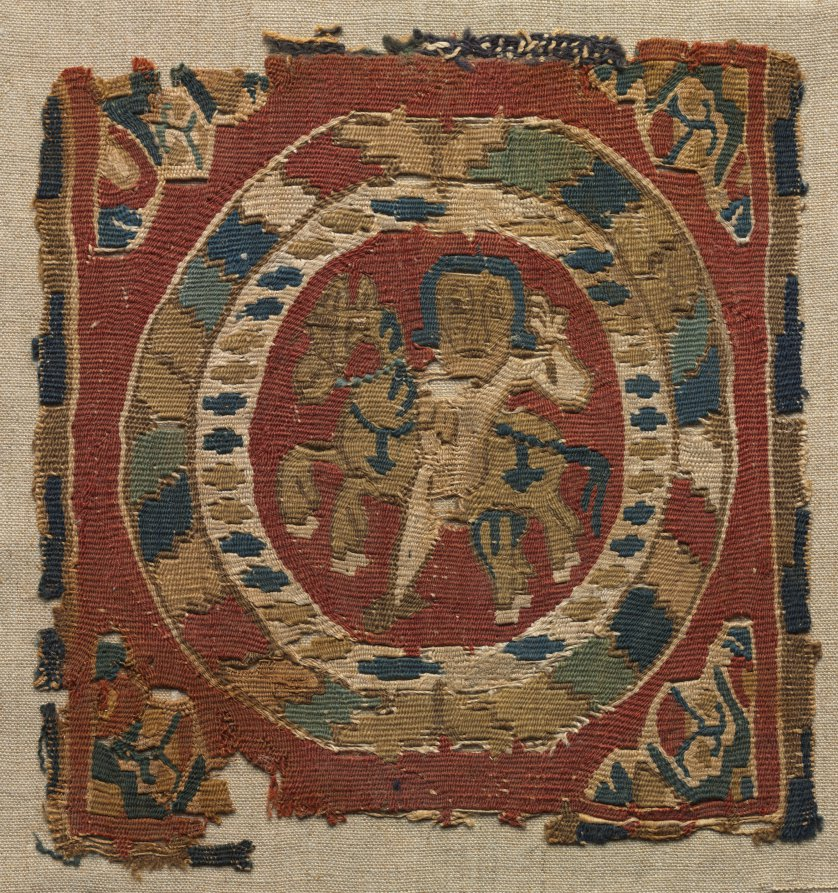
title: Segmentum from a Tunic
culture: Egypt, Abbasid period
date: 800 – 850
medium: tapestry weave; wool and linen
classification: Textile